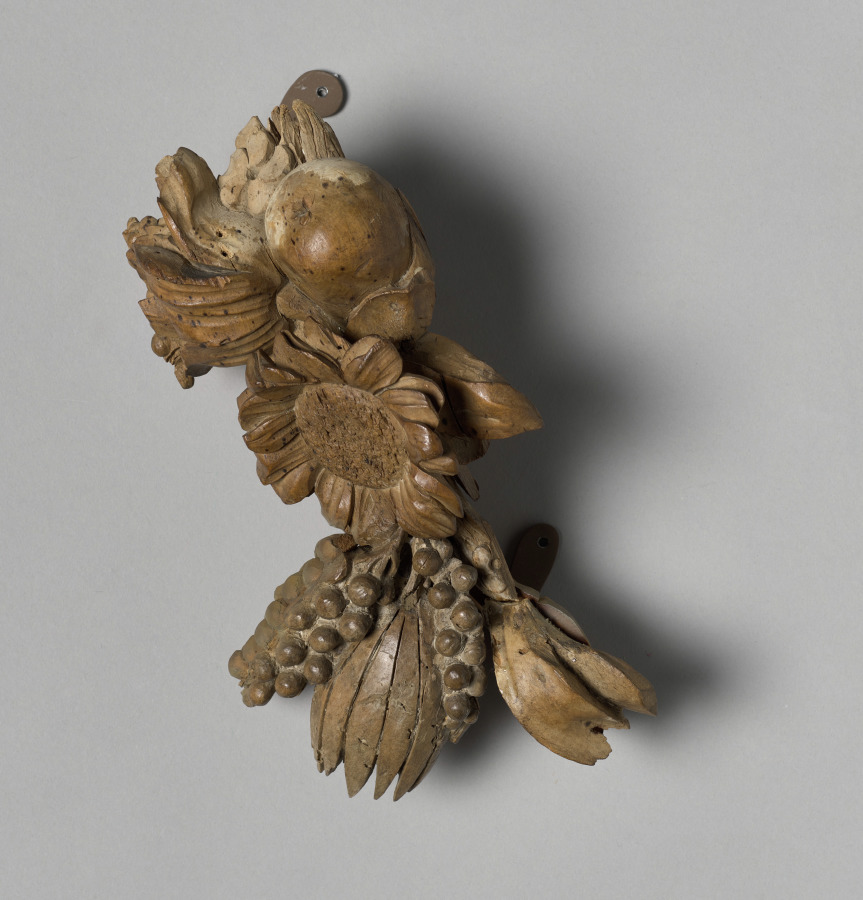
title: Carving from an Overmantel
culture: England, 17th century (Charles II)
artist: Grinling Gibbons (British, 1648–1721)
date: c. 1675–77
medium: lindenwood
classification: Sculpture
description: See cover record.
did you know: The swags of fruit and foliage featured in this wooden overmantel decoration evoke the bounty of the English countryside.